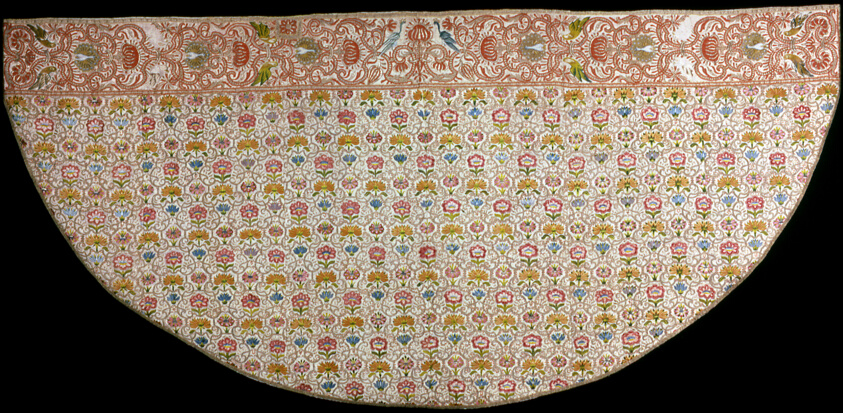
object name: Textile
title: Cope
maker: Italy or Sicily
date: 1601/75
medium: Silk, satin weave; underlaid with linen, plain weave; embroidered with silk, gilt-metal-strip-wrapped silk and gilt-metal-strips in crossed back, running, satin, and split stitches; laid work, couching, and padded couching; beaded with coral beads; edged with woven tapes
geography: Italy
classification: textile; needlework (visual works); liturgical